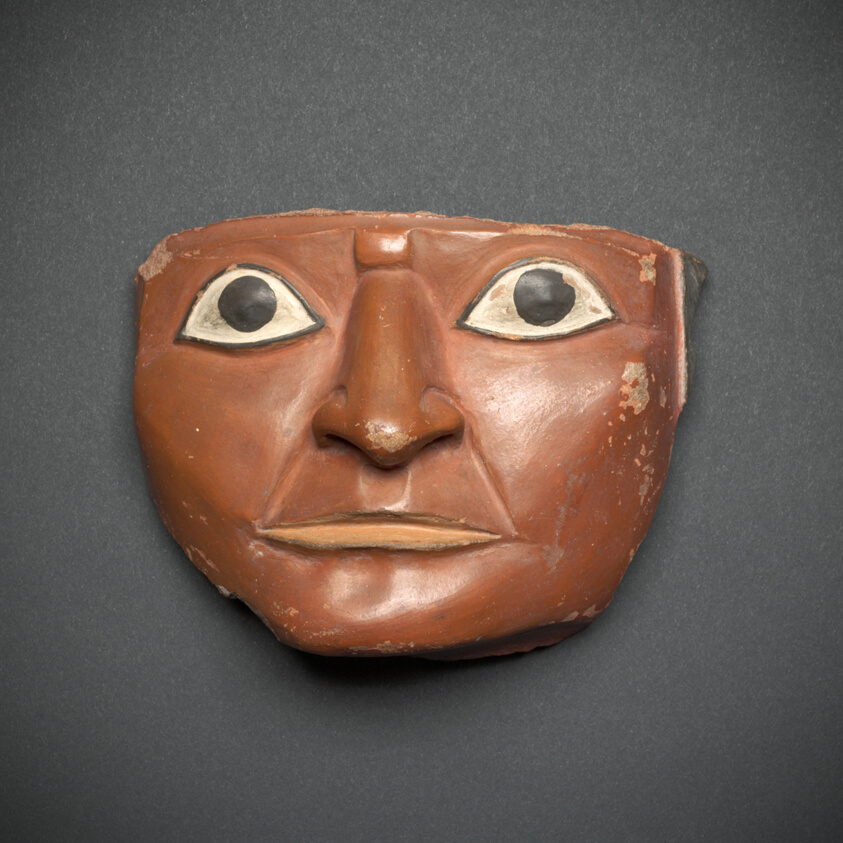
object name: Vessel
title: Head Fragment from a Large Ceremonial Jar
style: tiahuanaco, middle horizon, Pre-Columbian, americas, huari, andes, Arts of the Americas, andean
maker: Tiwanaku-Wari; Pacheco, south coast, Peru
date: 700–800 CE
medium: Ceramic and pigment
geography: Pacheco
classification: earthenware; ceramics; fragment; vessel; art of the americas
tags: people, faces